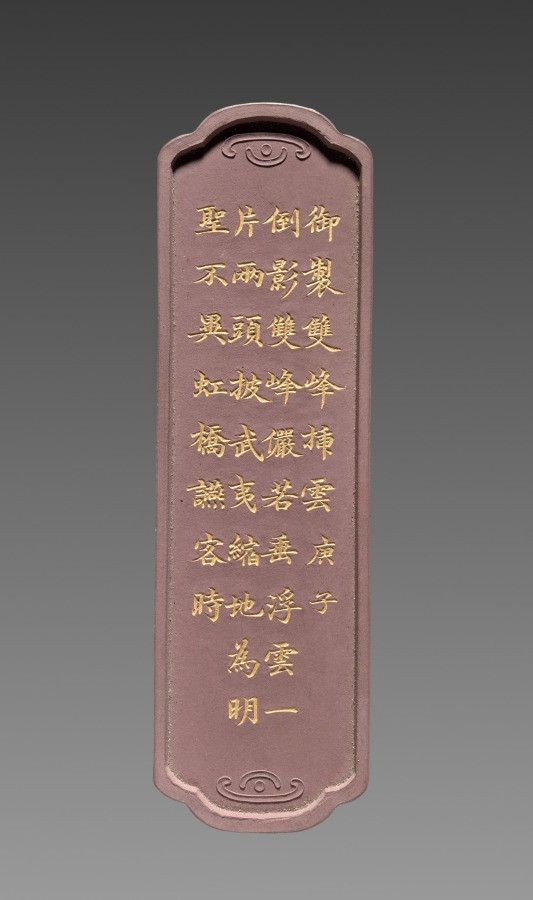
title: Ink Stick from an Imperially Commissioned Set of Ink Stick with Images and Poems of Famous West Lake Sites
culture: China, Qing dynasty (1644–1911), Qianlong reign (1736–95)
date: 1780–94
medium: Molded ink in brown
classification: Miscellaneous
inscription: 乾隆年製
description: This is one of ten ink cakes of different shapes and colors stored in an exquisite lacquer box. Each is inscribed in gold with a poem by the Qianlong emperor, praising the ten famous sights of the Westlake in Hangzhou, near Shanghai. The Westlake is famous for its natural beauty; it was a favorite imperial destination and remains a tourist attraction today. Ink cakes (also called ink sticks) are dissolved with the addition of water and ground on the surface of a flat stone into liquid ink for painting and calligraphy. The precious ink cakes here, however, have never been used.